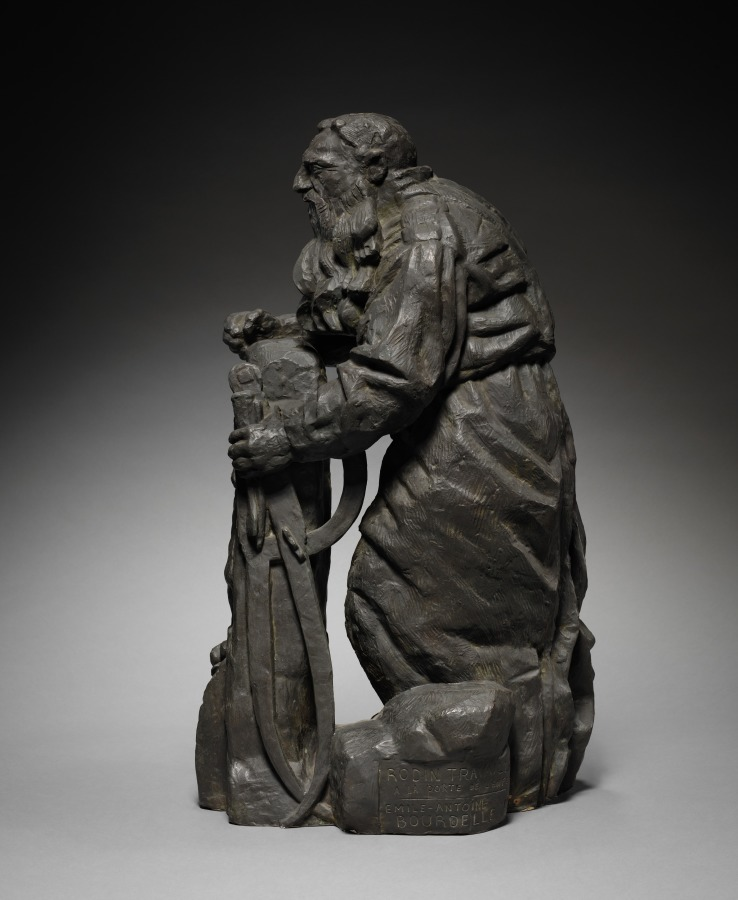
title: Rodin Working on "The Gates of Hell"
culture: France, 20th century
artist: Emile Antoine Bourdelle (French, 1861–1929)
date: 1910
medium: bronze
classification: Sculpture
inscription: Inscribed on side: "Rodin travaillant a la porte de l'enfer"; "Emile-Antoine Bourdelle, 1910"